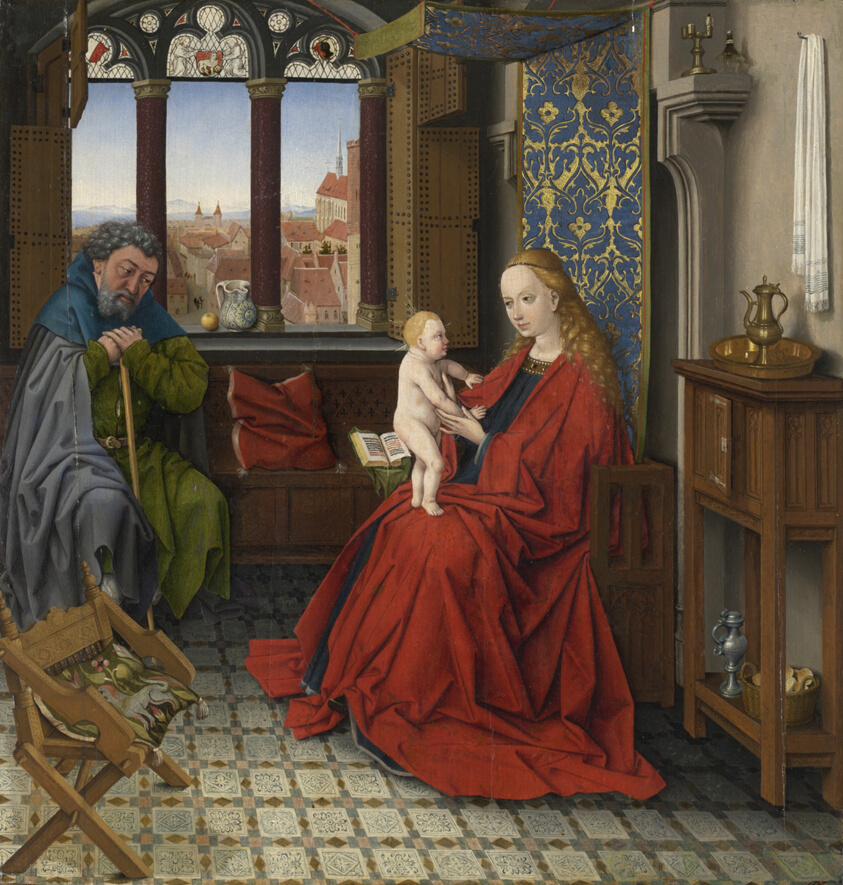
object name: Painting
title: Holy Family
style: 15th century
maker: South German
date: c. 1450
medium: Oil on panel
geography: Southern Germany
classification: oil on panel; german; oil paintings (visual works); paint; painting; european painting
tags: holy family, Buffet, pewter, vessels, Bread, chair, children, cities, interior, luxury, man, orange (color), oranges, pitcher, red (color), saints, stained glass, Tile, Virgin and child/Madonna and child, Virgin Mary, wealth, window, woman, woman with children